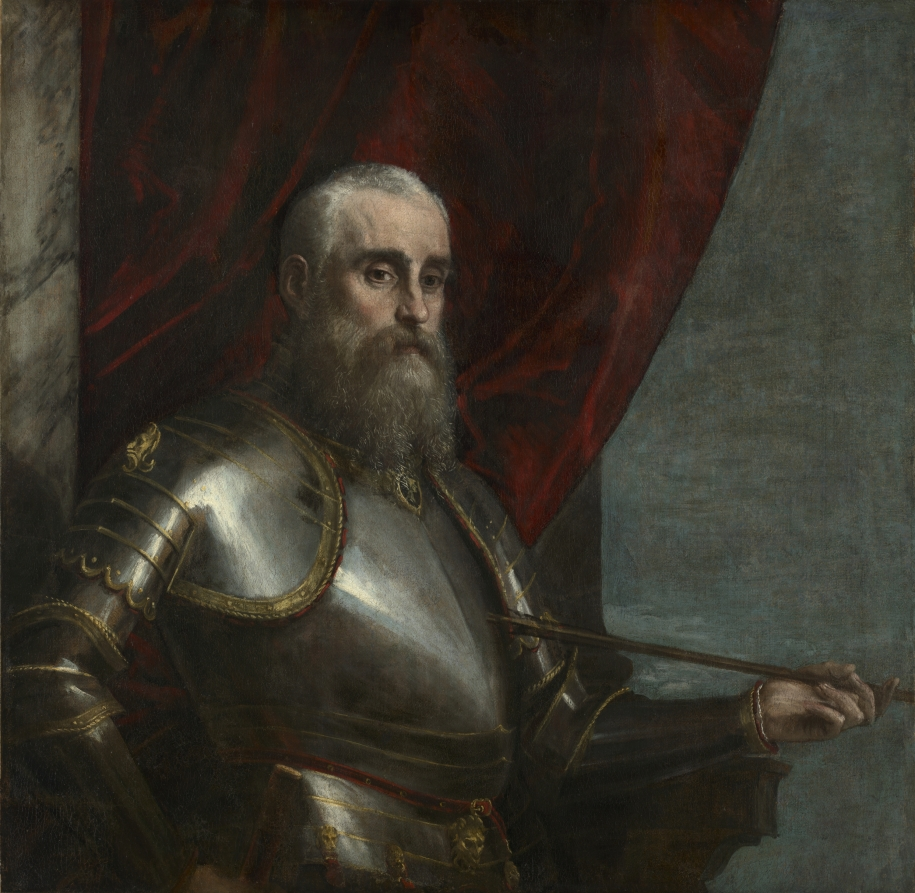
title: Portrait of Agostino Barbarigo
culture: Italy, Venice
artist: Paolo Veronese (Italian, 1528–1588)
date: after c. 1571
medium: oil on canvas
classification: Painting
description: Barbarigo served as second in command of the Venetian naval forces during the Battle of Lepanto, fighting against the Ottoman Empire on October 7, 1571. During the skirmish, Barbarigo was slain by a Turkish arrow, which he holds in the portrait. Barbarigo’s identity is defined by his military prowess. In the 1500s, Venetian military portraits often portrayed the sitter in armor in a pose typical of a Roman emperor, creating a link to the valor and might of ancient armies.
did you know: The arrow symbolically indicates that this portrait was painted after the sitter died in battle.